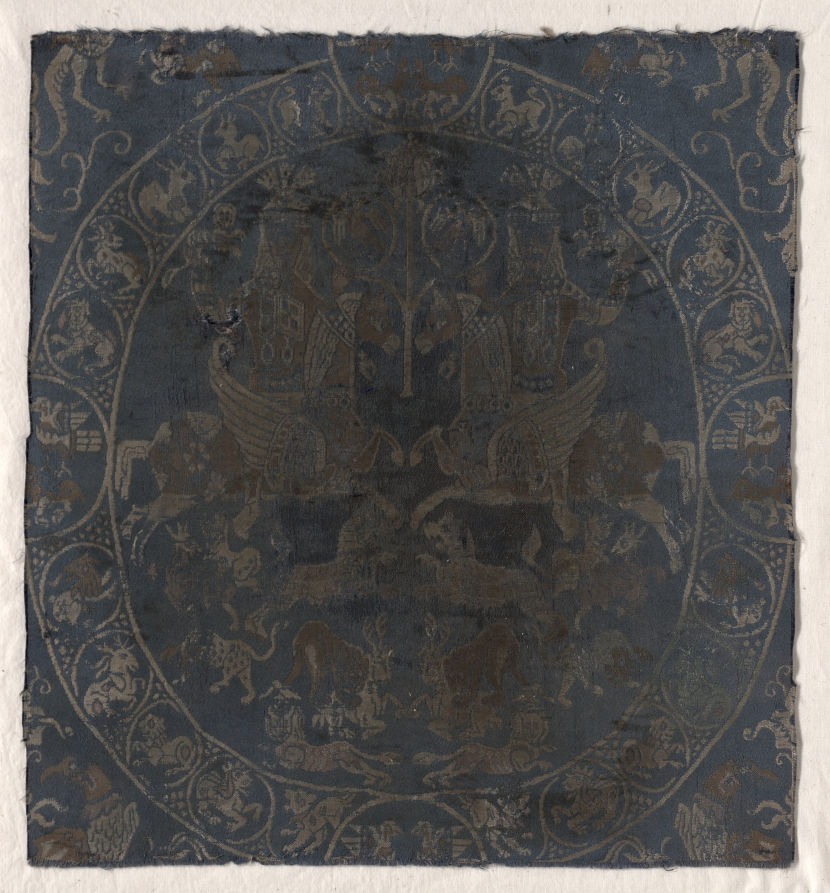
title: Modern Reproduction of the Bahram Gur silk in Berlin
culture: Germany, Krefeld ?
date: c. 1895 (?)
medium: diasper weave; silk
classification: Textile